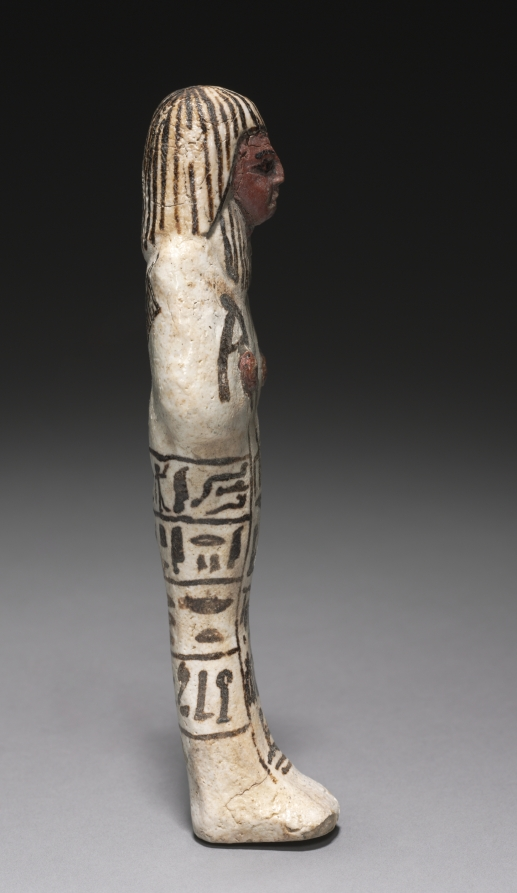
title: Shawabty of Djehutymose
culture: Egypt, New Kingdom (1540–1069 BCE), Dynasty 19, reign of Ramesses II (1279–1213 BCE)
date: 1279–1213 BCE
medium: polychrome faience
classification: Funerary Equipment